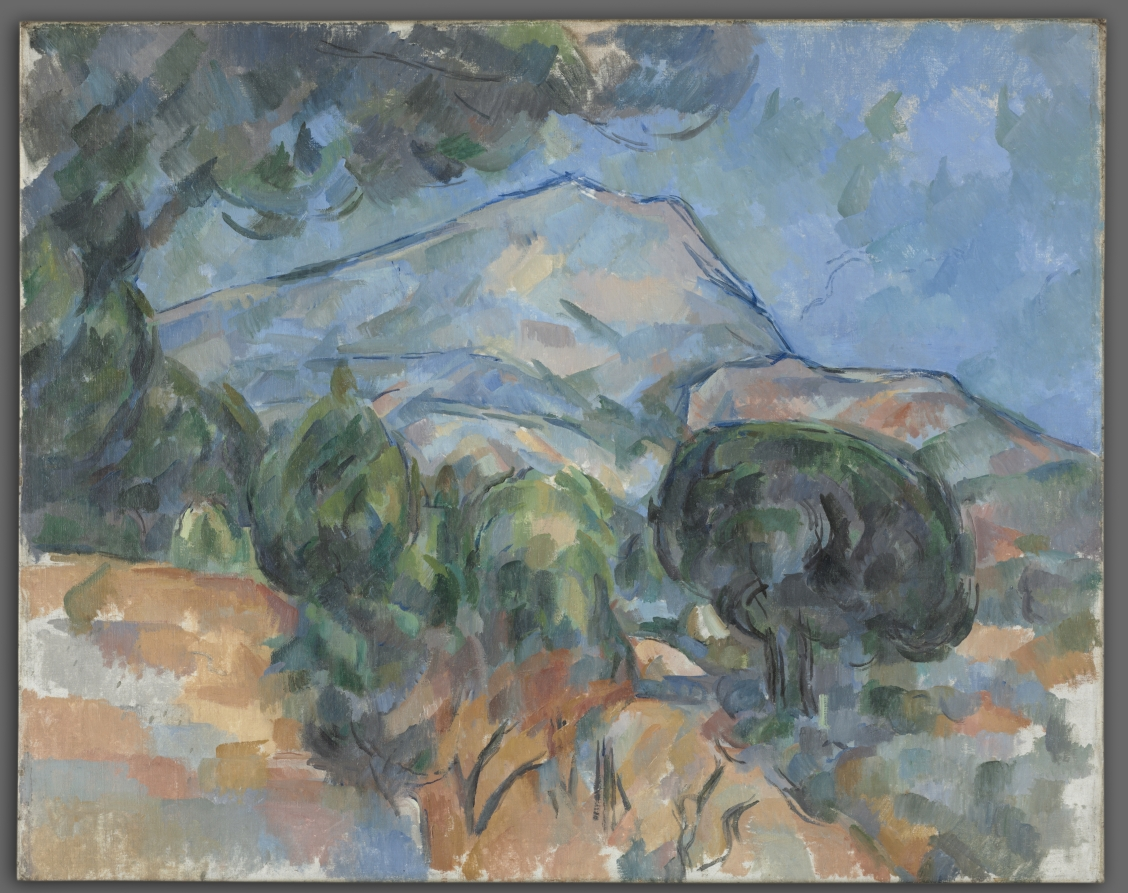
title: Mount Sainte-Victoire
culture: France, late 19th-early 20th Century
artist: Paul Cezanne (French, 1839–1906)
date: c. 1904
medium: oil on fabric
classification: Painting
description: During the last 20 years of his life, Cezanne repeatedly painted Mount Sainte-Victoire near his home in Aix-en-Provence in southern France. Cezanne painted this view from life at one of his favorite sites, a small road that led from Aix eastward toward Mount Sainte-Victoire. He set up his easel at the edge of the road where he could see two umbrella pines and the mountain towering over the scene. A branch of one of the pines extends from the left of the canvas across the sky, echoing the slope of the mountain, linking the near and the far.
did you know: Cezanne created 36 paintings and 45 watercolors of Mount Sainte-Victoire. He was preoccupied with this subject and painted this mountain repeatedly until his death.